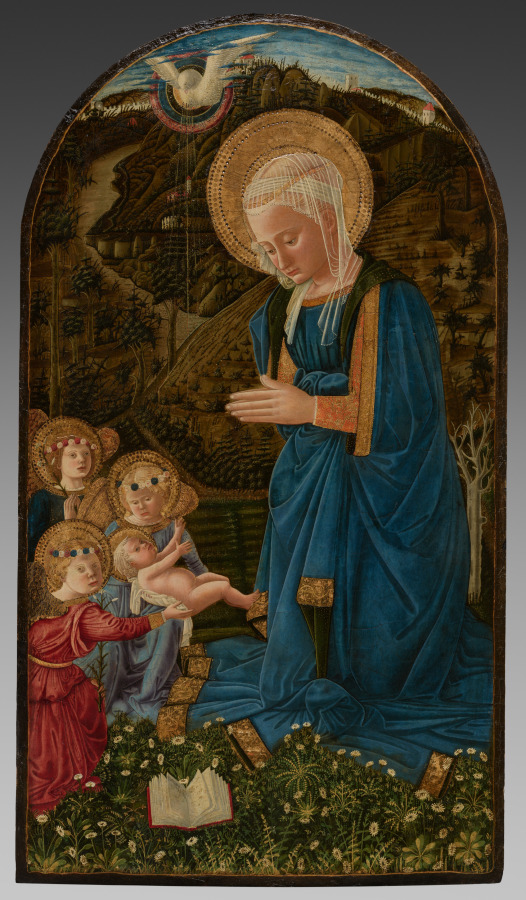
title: Virgin and Child with Angels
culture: Italy, Florence, 15th century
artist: follower of Fra Filippo Lippi (Italian, c. 1406–1469)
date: c. 1460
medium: tempera and gold on wood panel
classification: Painting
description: This painting, produced by one of Fra Filippo Lippi’s many imitators in the city of Florence, is very close to the composition of the now lost central panel of the triptych commissioned by the Medici family in 1457. It was purchased by Mrs. L. E. Holden before the museum’s acquisition of the two flanking panels of Saint Anthony Abbot and Saint Michael. It has been suggested that this painting is a copy of the original lost central panel of Fra Filippo’s triptych of 1457.